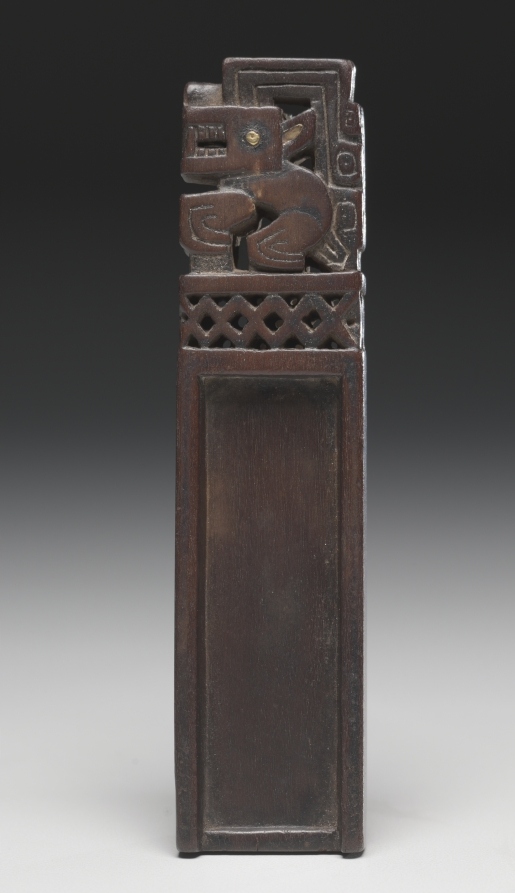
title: Snuff Tablet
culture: Peru, North Highlands, Recuay style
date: 1–650 CE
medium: wood with gold foil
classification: Furniture and woodwork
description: Both of these objects feature a creature known as the "Recuay feline," although it could also refer to a fox, dog, or viscacha (a rodent). Whatever its identity, the prominent crest on its head ties it to the supernatural realm, a connection underlined by the deity head that also appears on the dipper and by the ritual function of snuff tablets, which were used to inhale hallucinogenic snuffs during religious ceremonies.